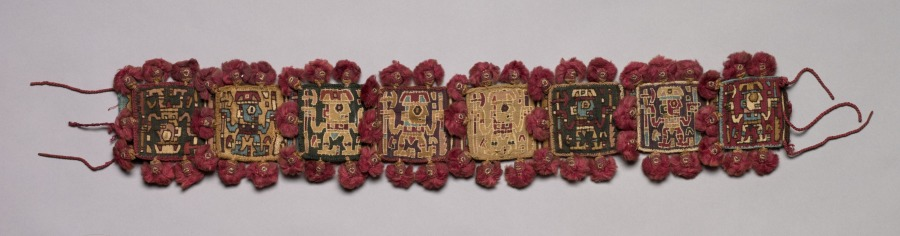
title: Band (Headband?)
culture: Central Andes, Moche-Wari Style, mid-7th to mid-9th century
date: c. 650–850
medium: Camelid fiber (alpaca; weft) and cotton (warp); tapestry weave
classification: Textile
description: This jewel-like textile, perhaps the only one of its kind, is made from a single band accordion-folded to form tabs, each edged with lush red tassels. Repeated in different colors down its length is the image of a warrior who holds an axe in one hand and a jagged, club-like object in the other. The reversed orientation of several of the warriors may be the result of the weaving method.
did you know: This unusual band may have been worn as a headband.